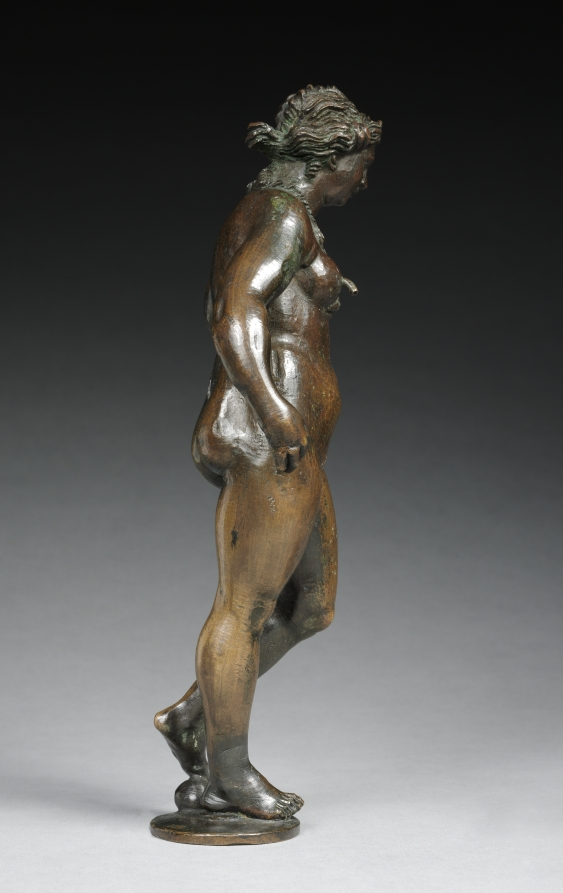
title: Fountain Figure of Abundance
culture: Germany, Augsburg, 16th century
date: c. 1530–40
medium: bronze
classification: Sculpture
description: The spout coming out of the breast indicates that this figure was part of a table fountain--a specialty of Augsburg artists. Her nudity and naturalistic proportions demonstrate the impact of Italian Renaissance art in southern Germany during the early 1500s.